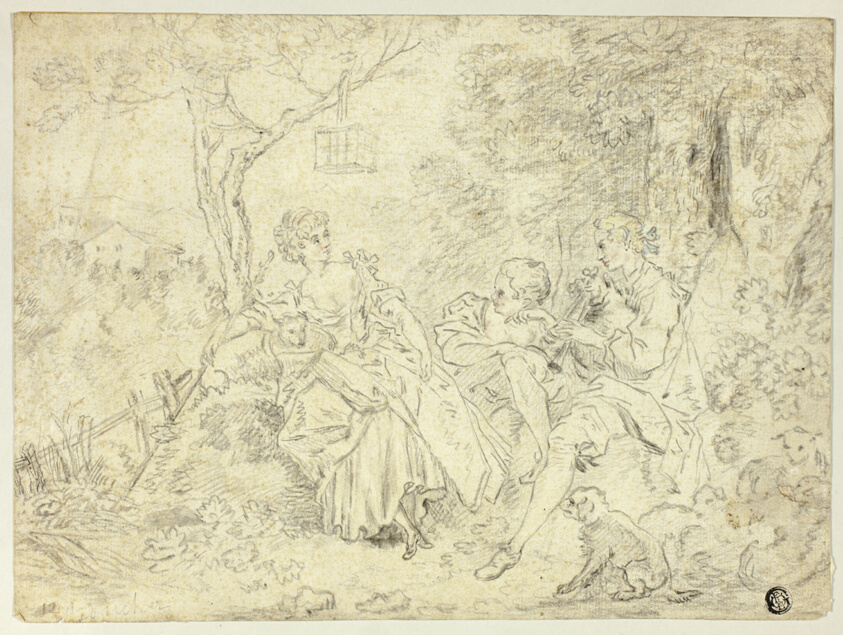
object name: Drawing and Watercolor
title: Shepherdesses and Young Man Playing Bagpipe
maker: After François Boucher; French, 1703-1770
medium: Charcoal with brush and gray wash, touches of yellow and blue and pink wash, and traces of pen and black ink, over graphite, on cream laid paper hinged on gray wove paper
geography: England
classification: graphite; drawings (visual works); prints and drawing